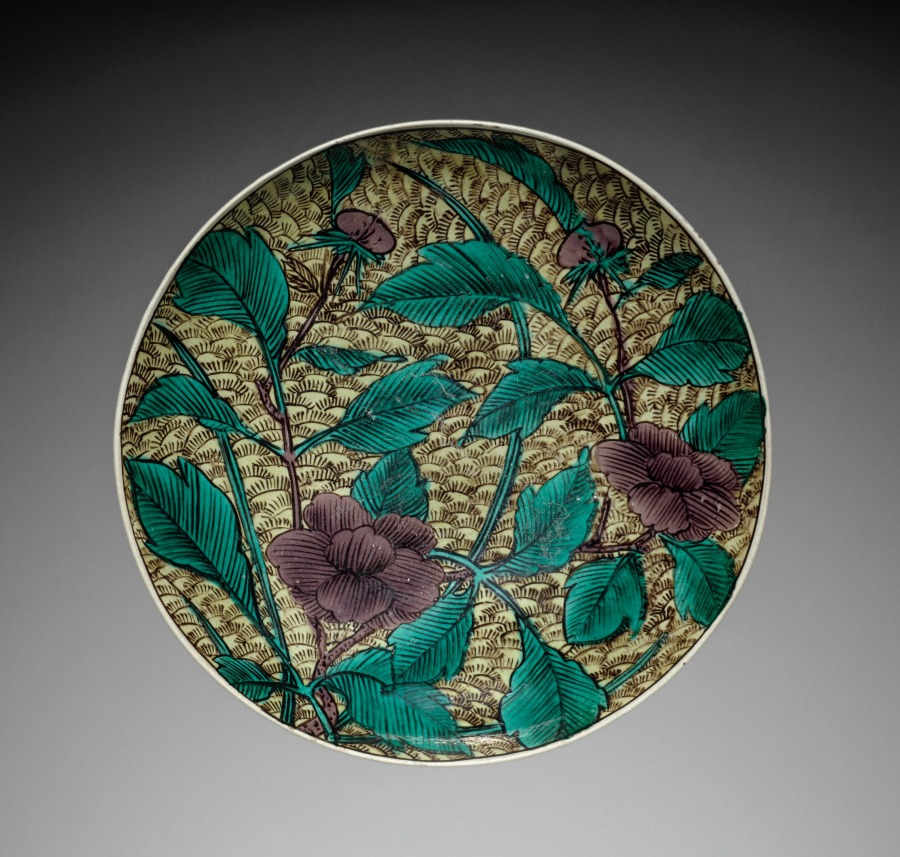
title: Plate with Peonies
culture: Japan, Edo period (1615–1868)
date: early to mid-1800s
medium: porcelain with decoration in overglaze enamels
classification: Ceramic